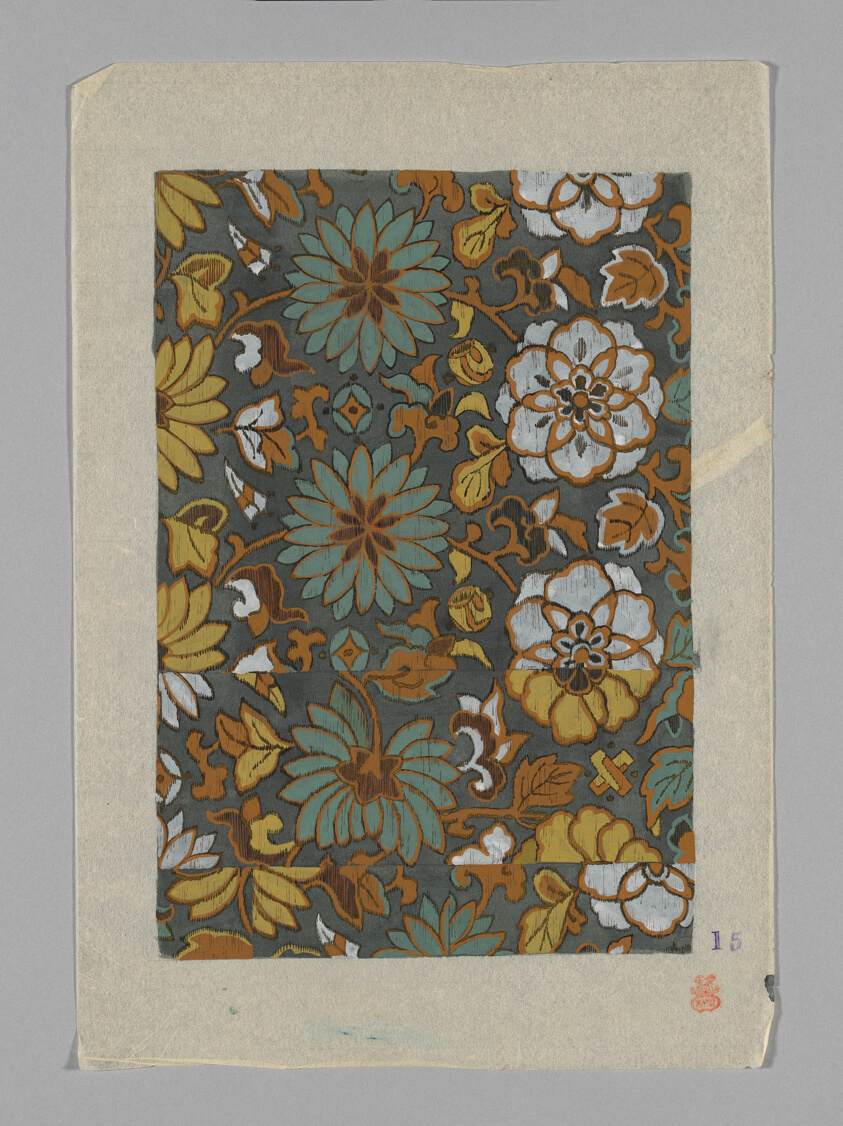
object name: Drawing and Watercolor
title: Design on Paper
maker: Japan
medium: Paper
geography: Japan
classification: textile; accessory - paper design; paper; watercolor